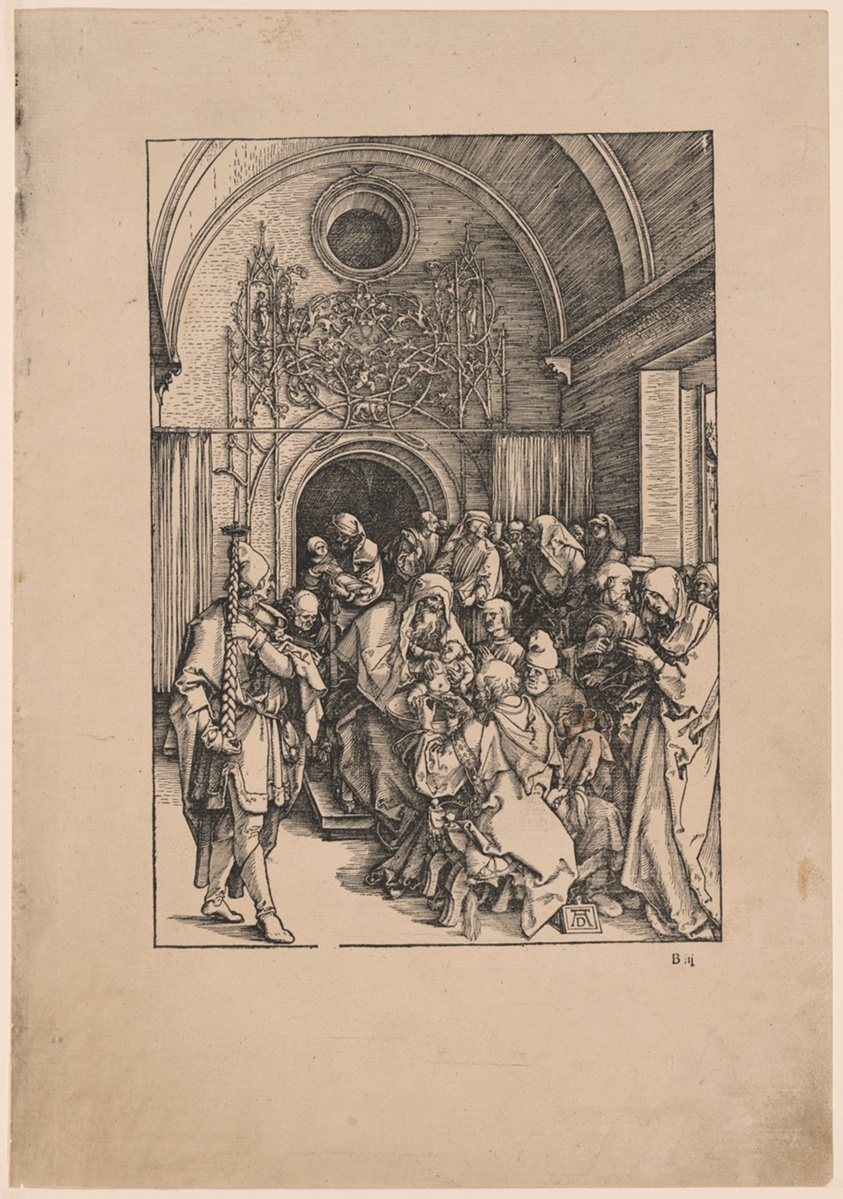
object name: Print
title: The Circumcision of Christ, from The Life of the Virgin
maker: Albrecht Dürer (German, 1471-1528)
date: c. 1505, published 1511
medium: Woodcut in black on tan laid paper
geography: Germany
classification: woodcut; print; prints and drawing; paper